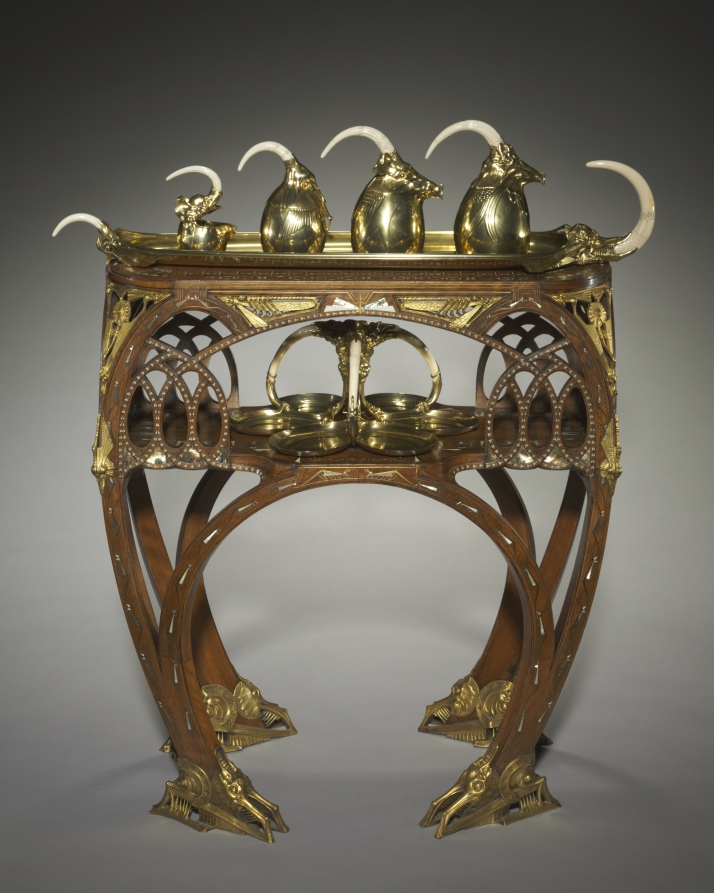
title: Salver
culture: France, Paris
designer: Carlo Bugatti (Italian, 1856–1940)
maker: Adrien-Aurélien Hebrard (French, 1866–1937)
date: c. 1907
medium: Gilt silver and ivory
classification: Silver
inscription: inscribed inside one of six ovoid compartments: "Bugatti" in ligature. Engraved on back: A.A. HEBRAND/ 8 RUE ROYAL/PARIS FRANCE.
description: This tea and coffee service, salver, and table, together with some now missing cups, were all designed by Carlo Bugatti as an ensemble and presented at the 1902 exposition devoted to decorative arts in Turin, Italy. The set was probably acquired from Bugatti's 1907 exhibition at the Galerie Hébrard in Paris by a wealthy South African widow, Anna Blake, who was living there at the time. Some of the animal and insect motifs suggest mythical beasts or the fossils of prehistoric animals. When Mrs. Blake returned to Cape Town, she took these and other pieces designed by Bugatti with her, and they remained in South Africa throughout her lifetime.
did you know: Carlo Bugatti's sons achieved illustrious careers of their own. Rembrandt Bugatti (1884-1916) became a celebrated sculptor, and Ettore Bugatti (1881-1947) manufactured luxurious automobiles and racing cars.